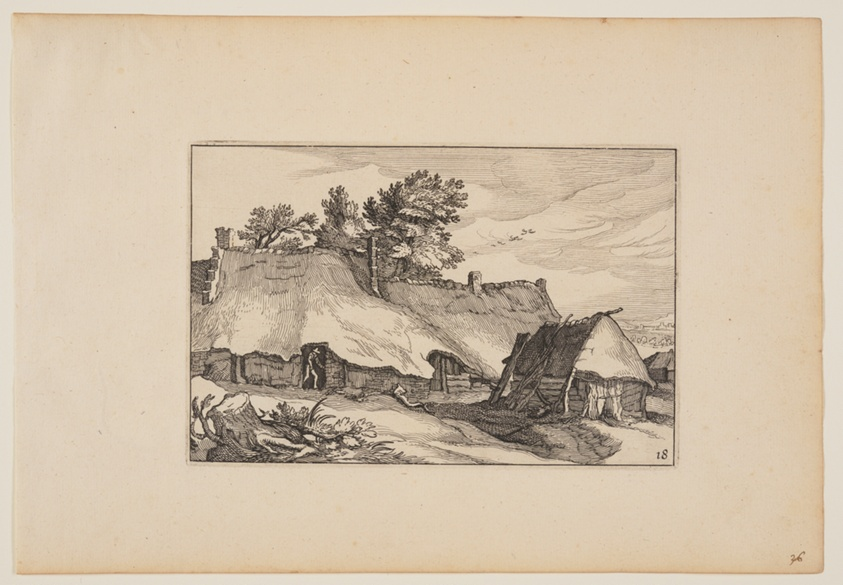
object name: Print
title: A Farm, Man in the Doorway, from Landscapes (Verscheyden aerdige Lanthuysen...)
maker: Claes Jansz. Visscher (Netherlandish, c. 1550–c. 1612); after Abraham Bloemaert (Dutch, 1566–1651)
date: 1620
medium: Etching on ivory laid paper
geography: Netherlands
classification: print; paper; prints and drawing; etching